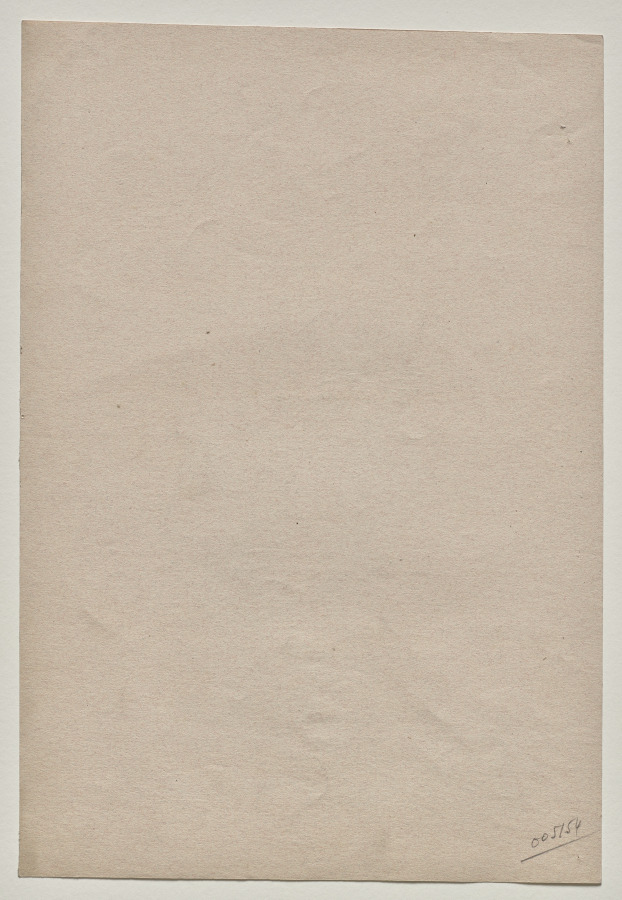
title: Architecture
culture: France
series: Muses of the Arts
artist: Marie Bracquemond (French, 1840–1916)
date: 1878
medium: black chalk on pale pink wove paper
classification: Drawing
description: Marie Bracquemond was among a few women artists within the Impressionist circle. After exhibiting at the Salon from a relatively young age, she married the printmaker Félix Bracquemond and met artists such as Claude Monet and Edgar Degas through his friendship with them. This drawing is one of several compositions related to Muses of the Arts, one of Bracquemond’s best known works, featuring personifications of various artforms—such as, here, architecture. The completed work was featured in the Exposition Universelle in 1878, while the related drawings, possibly including this one, were singled out for praise in the 1879 Impressionist group exhibition.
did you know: Although Marie Bracquemond was supported and widely respected by her colleagues in her own time, her husband’s reticence to her pursuing a career ultimately led her to limit her artistic production.